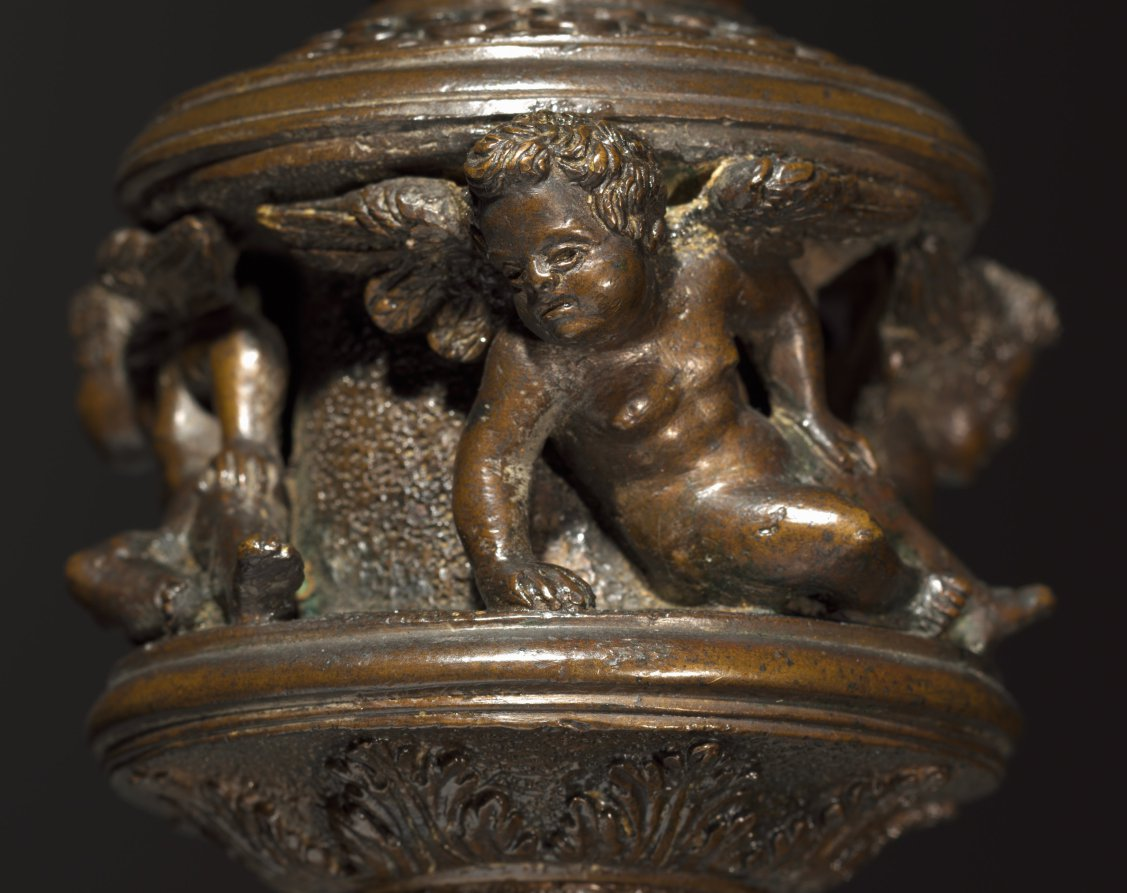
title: Paschal Candlestick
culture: Northern Italy, possibly Padua, 16th century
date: c. 1525–1550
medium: bronze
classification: Sculpture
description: In Roman Catholic practice, a large candlestick holds the Paschal Candle, blessed and lit for the first time on Easter eve, then used on significant occasions throughout the year. Despite its religious function, the decorations here are entirely secular-ranging from panthers and bound satyrs to the heads of raptors and goats. These elements derive from ancient Roman sculpture and were especially popular among intellectuals in northern Italy, who were actively exploring connections among pagan traditions, ancient philosophy, and Christianity.